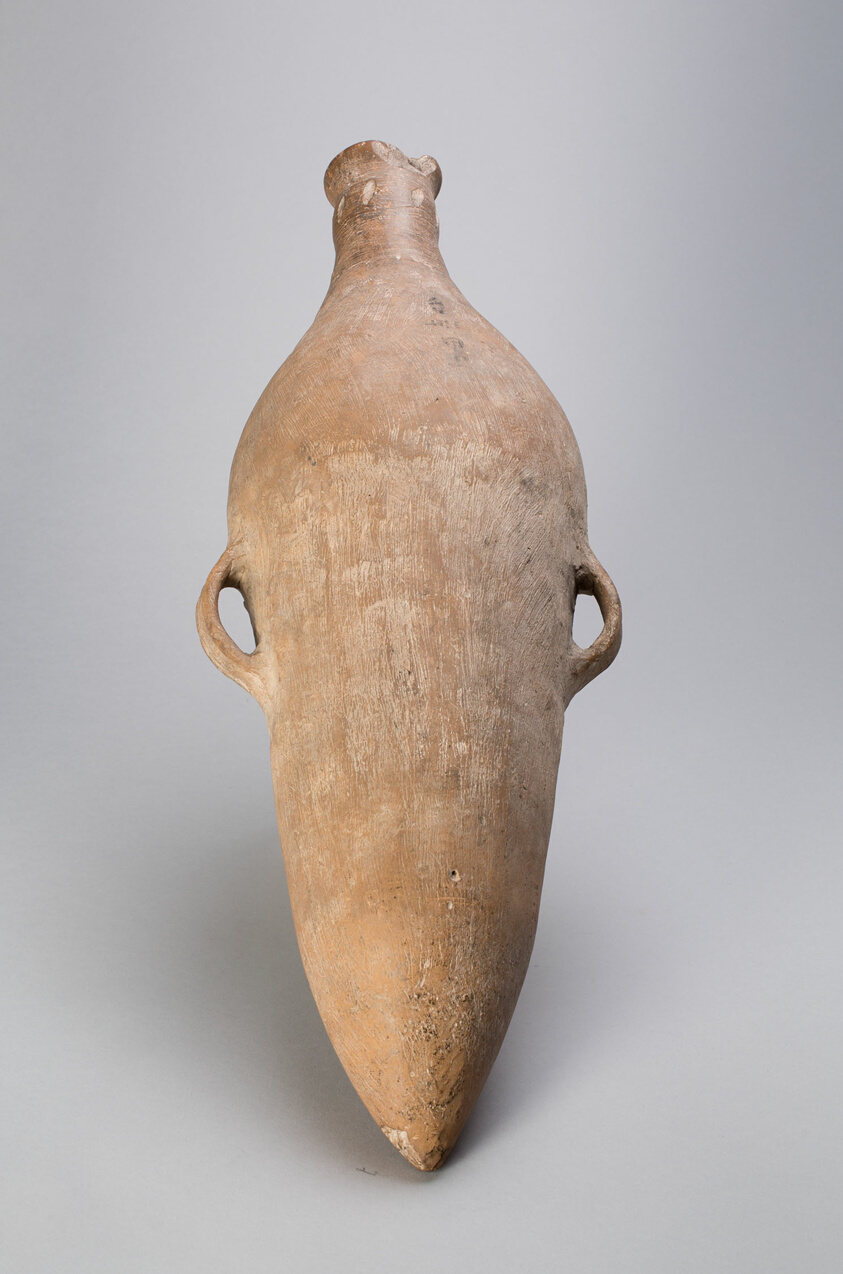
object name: Vessel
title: Amphora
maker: China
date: c. 5th–3rd century B.C.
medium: Earthenware with striated surface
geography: China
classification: ceramics; asian art; vessel